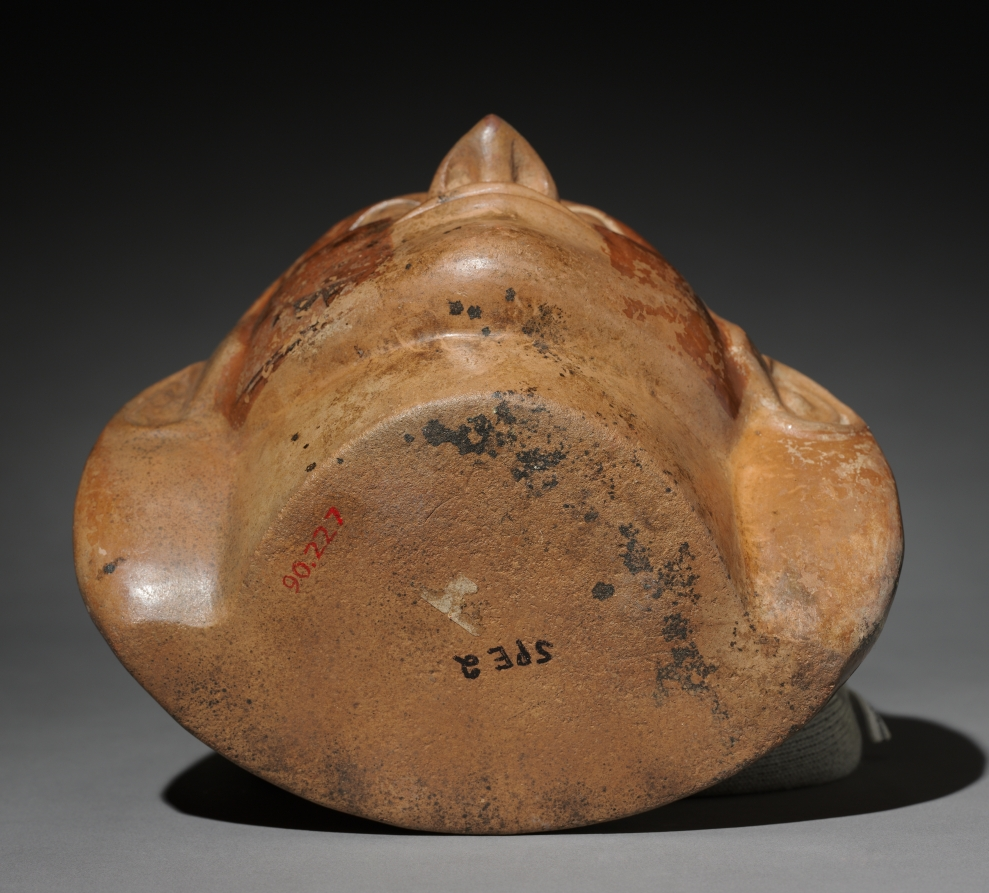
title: Portrait Head Vessel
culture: Peru, North Coast, Moche style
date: c. 200–550 CE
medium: earthenware with colored slips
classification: Sculpture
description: The Moche were unique in ancient Peru in creating realistic human portraits, usually in the form of ceramic vessels. In general, such vessels represent more than 750 individuals; identities are unclear but most are elite men, some probably rulers. The stirrup-shaped spout is a hallmark of Moche ceramic production.